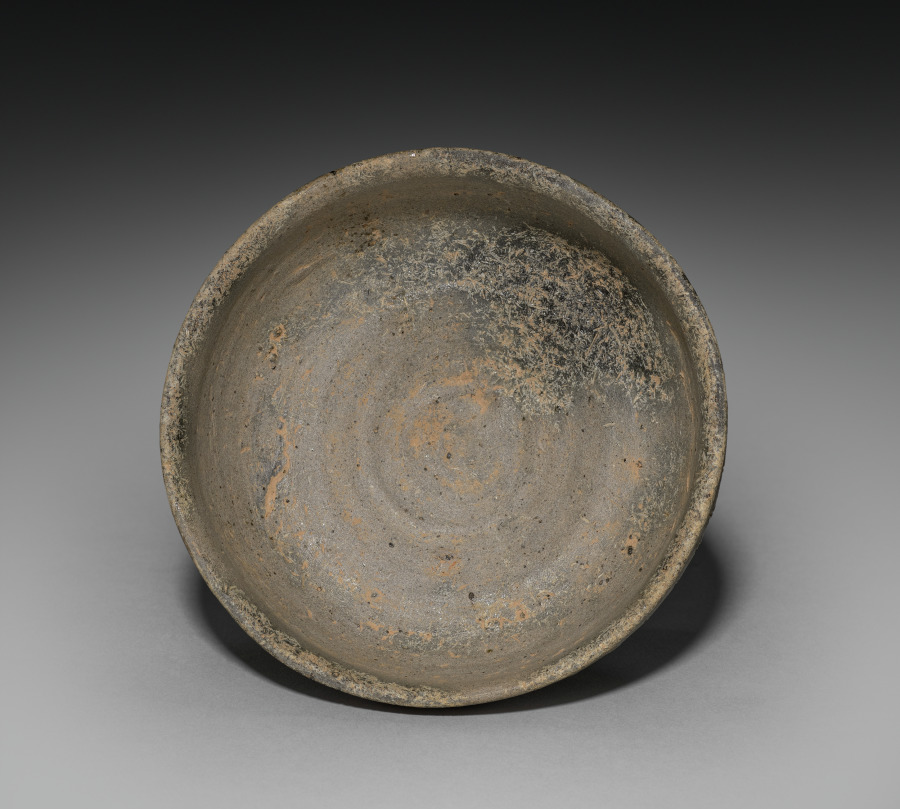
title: Burial Urn with Stamped Design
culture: Korea, Unified Silla period (676-935)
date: 500s–600s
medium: stoneware with stamped designs under olive-green glaze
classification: Ceramic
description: After the introduction of Buddhism, cremation became a common practice in Korea. This jar, which once contained the remains of the dead, may have nested in a larger stone container. The repetitive patterns that appear on the lid and the container was done with a stamping technique.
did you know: Containing the remains of the dead, this type of ancient clay pottery was excavated from tombs.